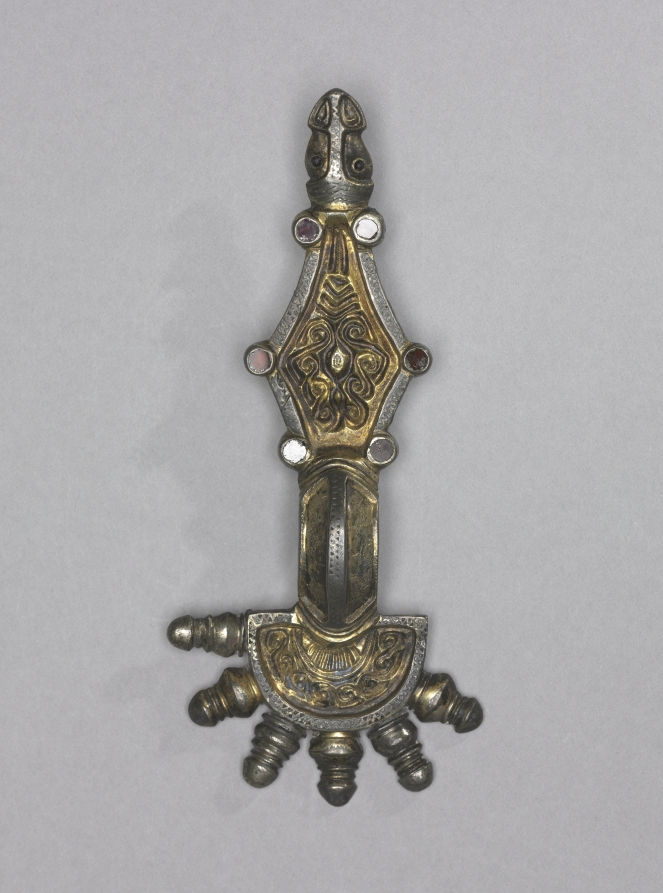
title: Fibula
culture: Ostrogothic, Migration period, 6th century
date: 500s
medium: gilt silver and garnets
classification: Jewelry